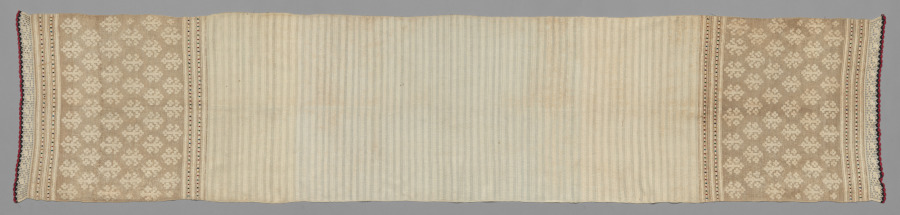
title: Towel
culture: Spain(?)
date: 1900–1920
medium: Plain weave and weft brocaded linen: crochet and embroidery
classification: Textile